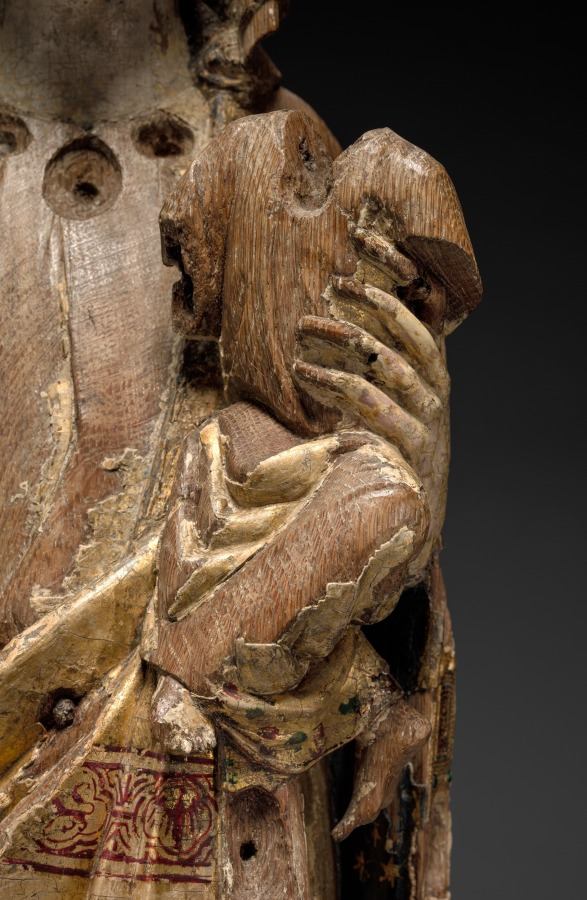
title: Virgin and Child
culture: Mosan (Valley of the Meuse), Liège(?), late 13th century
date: late 1200s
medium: wood (oak) with polychromy and gilding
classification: Sculpture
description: This sculpture is a rare survival in wood from the valley of the Meuse River (modern Belgium and Holland), an important region for the production of ecclesiastical art in the 1100s and 1200s. The elegantly draped figure is remarkable for the preservation of much of its original paint and gilding, including the Virgin's gilded mantle highlighted with decorative bands of geometric patterns and the green dragon on which she stands. There are small settings around the Virgin's neck and along the border of the mantle that would have originally been set with gem and glass cabochons in imitation of the richly adorned metalwork for which Mosan art was highly esteemed. The settings for these cabochons provide some hint of the original opulence of this sculpture. The Virgin's serene features and beautiful countenance are noteworthy, as is the refined execution of the draperies.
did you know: Dragons, like the one Mary is standing on, sometimes look more like snakes in medieval art.